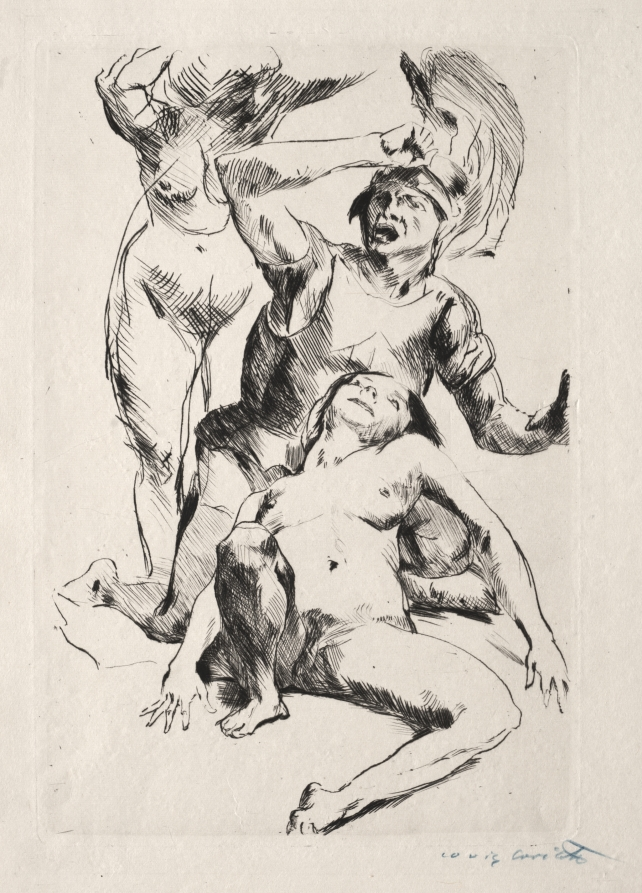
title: Theseus and Ariadne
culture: Germany, 20th century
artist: Lovis Corinth (German, 1858–1925)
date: 1914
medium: drypoint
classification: Print